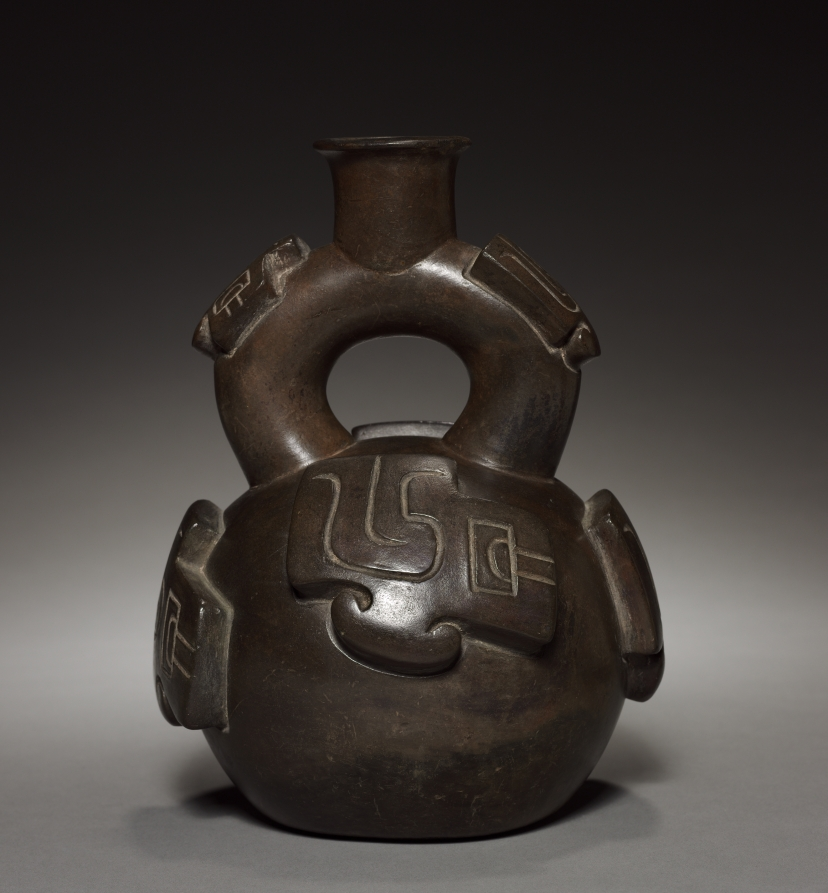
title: Vessel with Stirrup Spout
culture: Peru, likely modern, inspired by the Cupisnique style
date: 1900s (thermoluminescence date)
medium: earthenware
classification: Ceramic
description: The stirrup spout first appeared on the North Coast in the ceramics of the Cupisnique culture, a Chavín contemporary, and remained an important North Coast spout form until the time of the Spanish conquest. It probably had symbolic meaning, now lost.